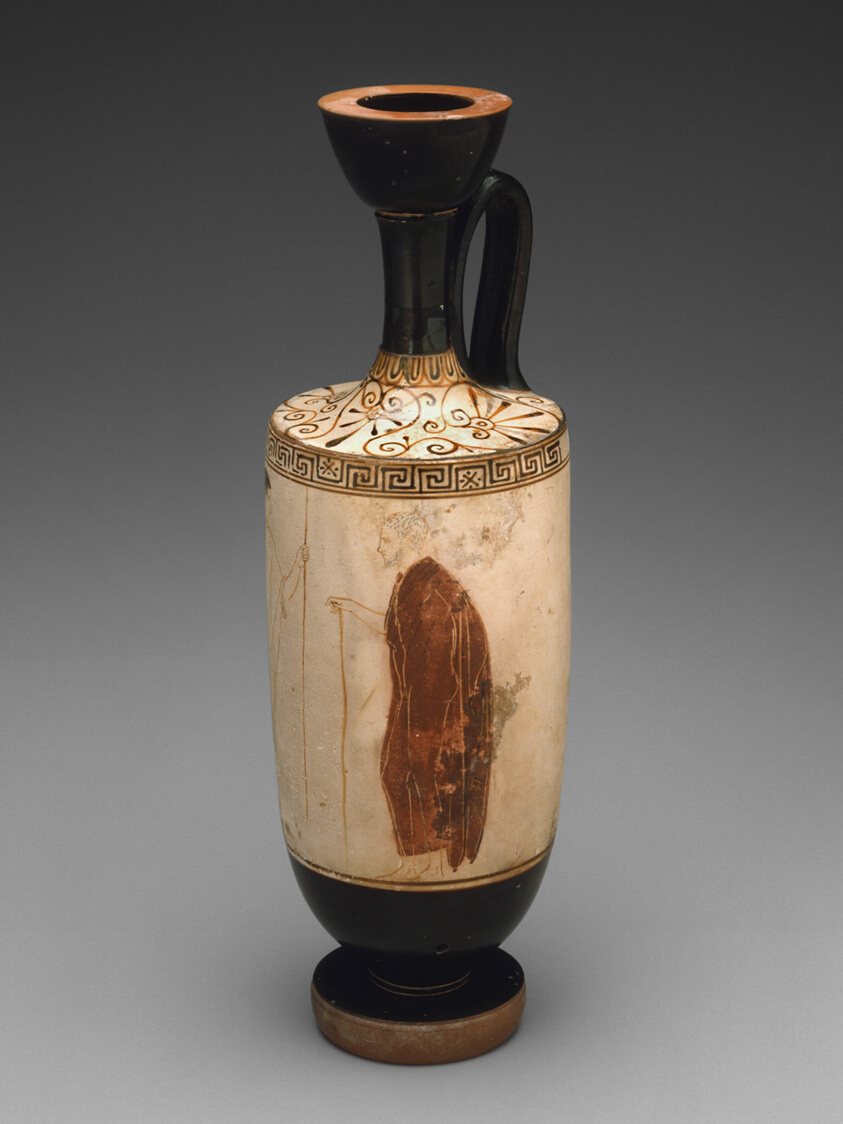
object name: Funerary Object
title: Lekythos (Oil Jar)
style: high classical, Classical, attic, white-ground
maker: Attributed to the Achilles Painter; Greek; Athens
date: 445-440 BCE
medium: terracotta, white-ground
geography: Athens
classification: vessel; earthenware; ceramics; ancient art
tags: funerary art, death, sons, fathers